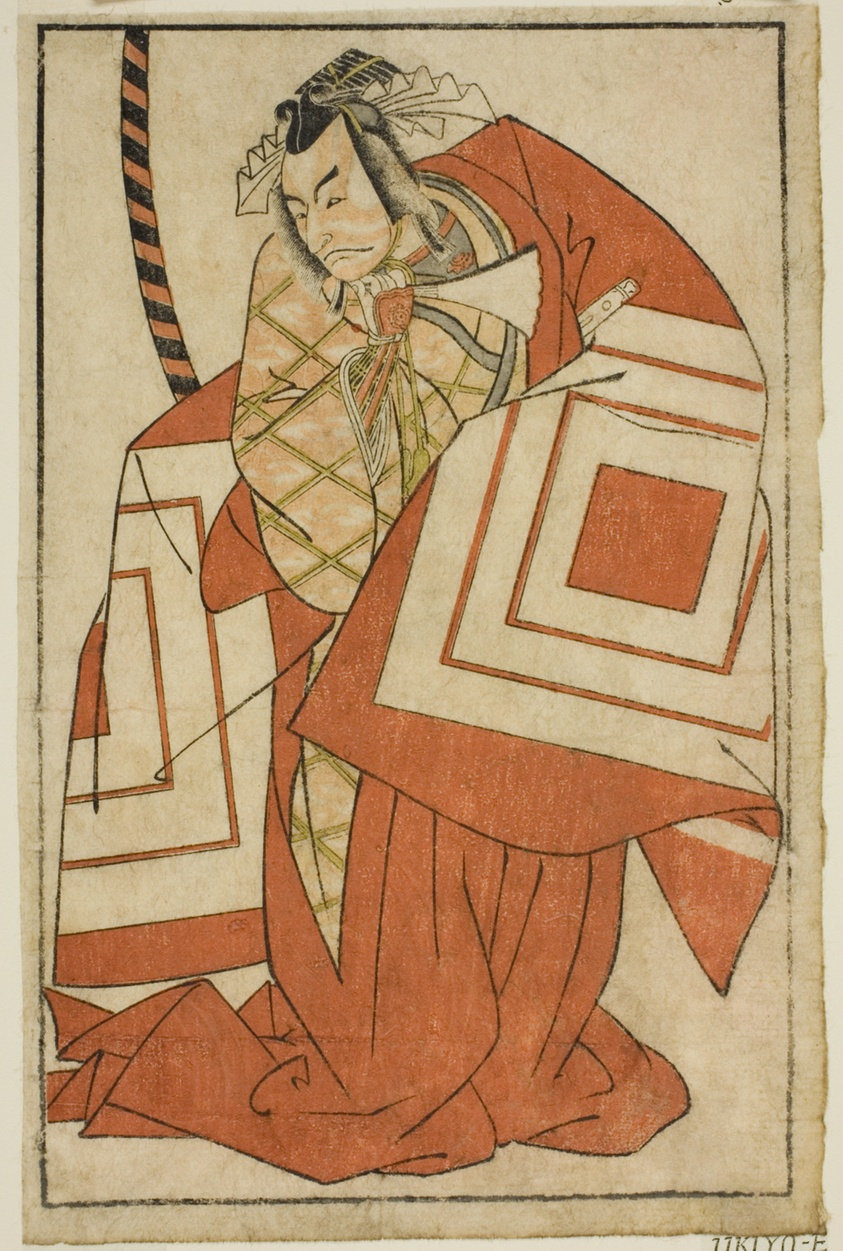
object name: Print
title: The Actor Ichikawa Danjuro V as Watanabe Kiou Takiguchi (?) in the Play Nue no Mori Ichiyo no Mato (?), Performed at the Nakamura Theater (?) in the Eleventh Month, 1770 (?)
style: Japanese (culture or style)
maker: Katsukawa Shunsho 勝川 春章; Japanese, 1726-1792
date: c. 1770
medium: Color woodblock print; illustration cut from Ehon Zoku Butai Ogi (1778)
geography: Japan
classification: woodblock print; print; asian art